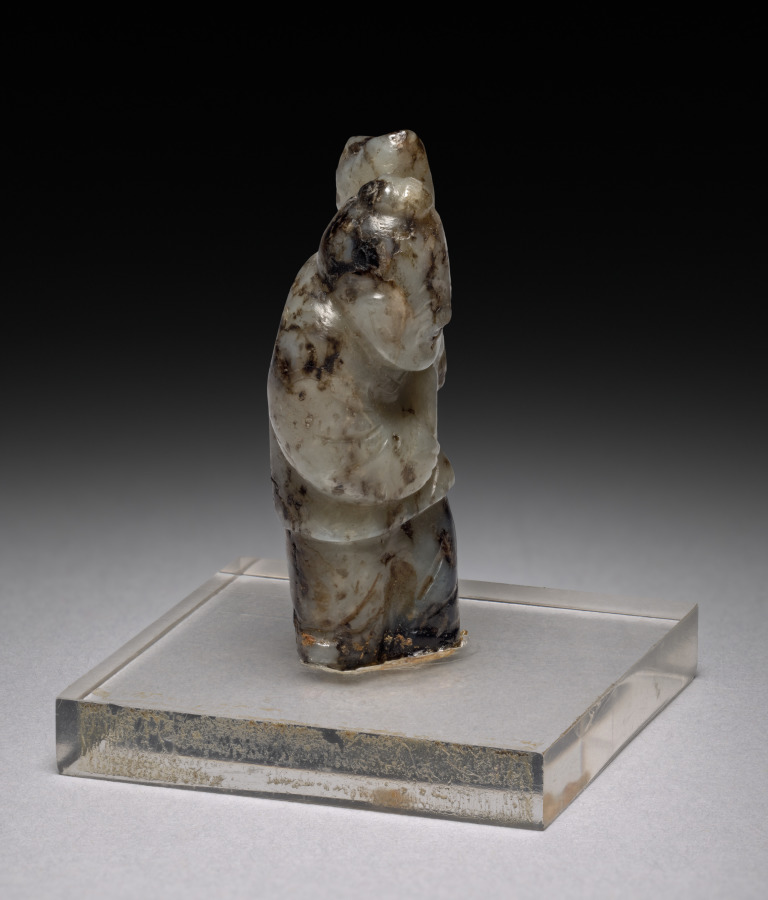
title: Boy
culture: China, Tang dynasty (618-907) - Song dynasty (960-1279)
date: 8th-10th Century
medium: jade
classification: Jade